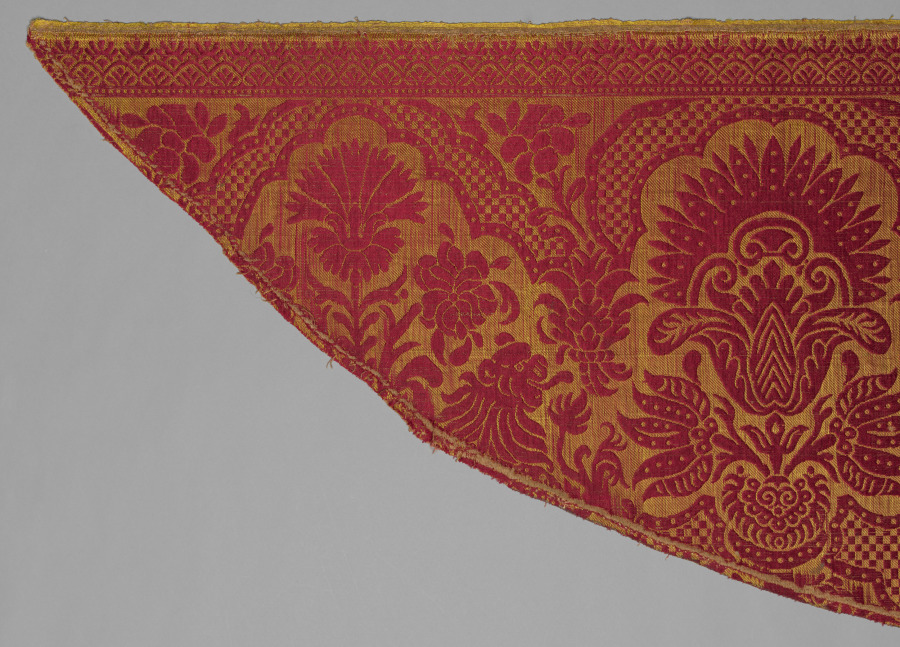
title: Silk and Hemp Fragment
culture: Spain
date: 1500s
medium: plain compound satin: silk and hemp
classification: Textile